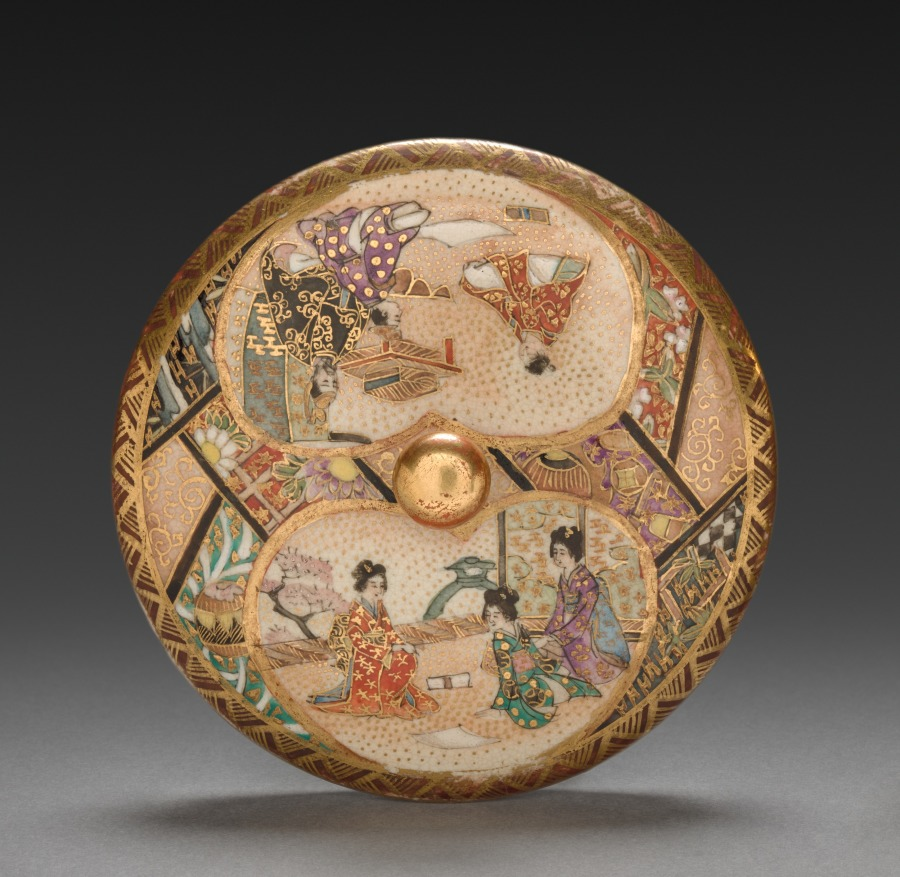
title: Covered Dish (lid)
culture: Japan, Meiji period (1868–1912)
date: early 1900s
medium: porcelain with overglaze color enamel and gold (Satsuma ware)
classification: Ceramic